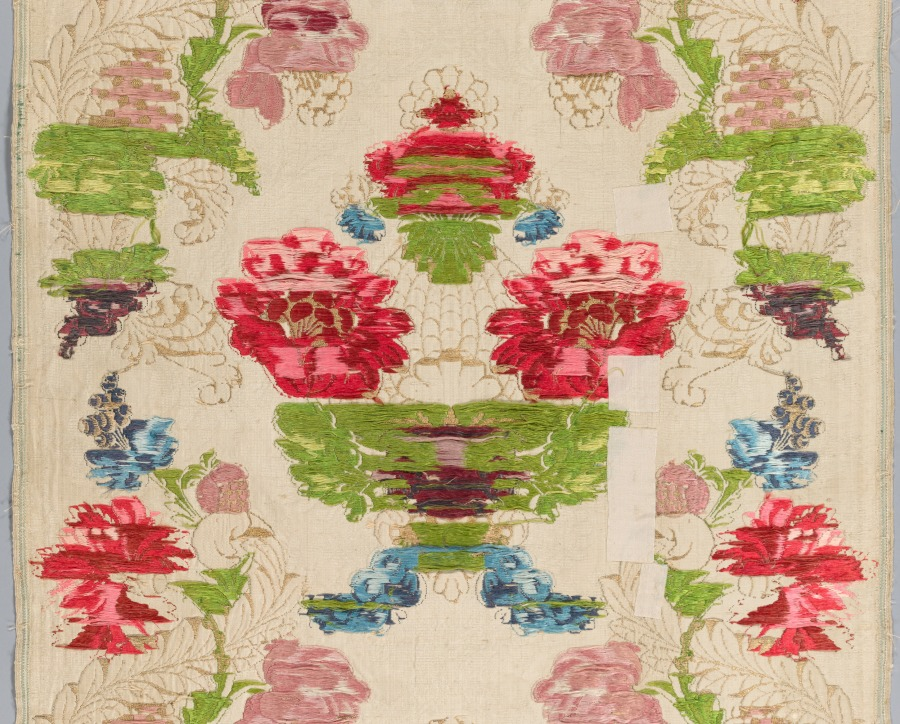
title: Length of Textile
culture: France or Italy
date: early 1700s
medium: brocade on satin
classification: Textile